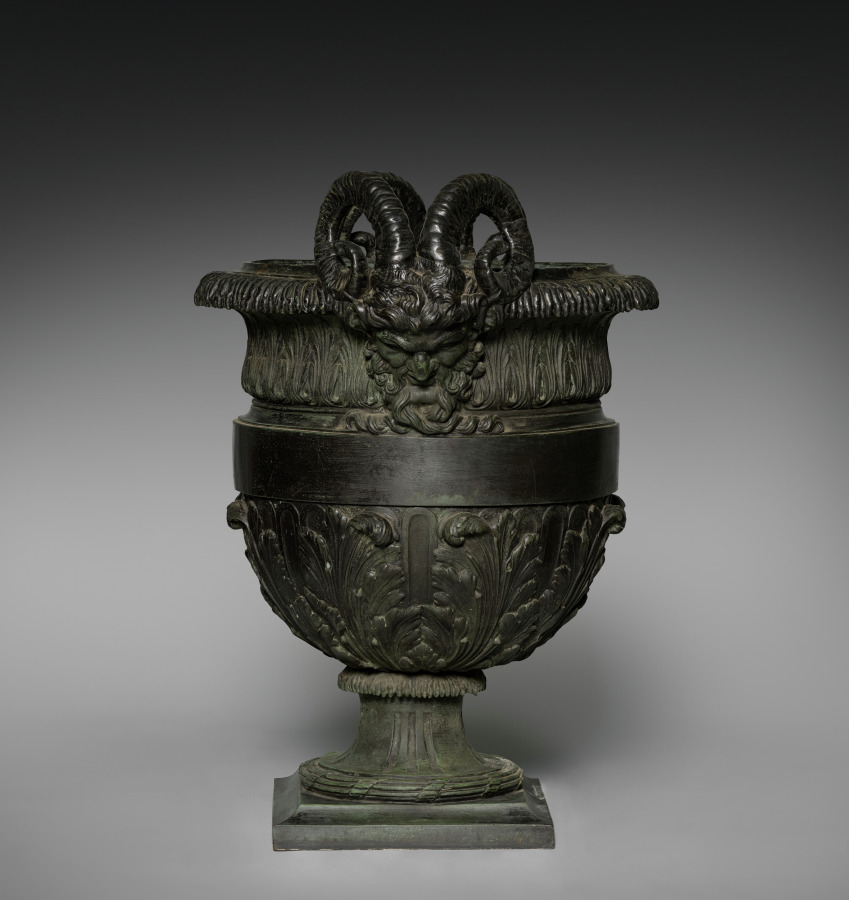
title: Urn with Satyr Heads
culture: France, 18th century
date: 1700s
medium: bronze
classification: Metalwork